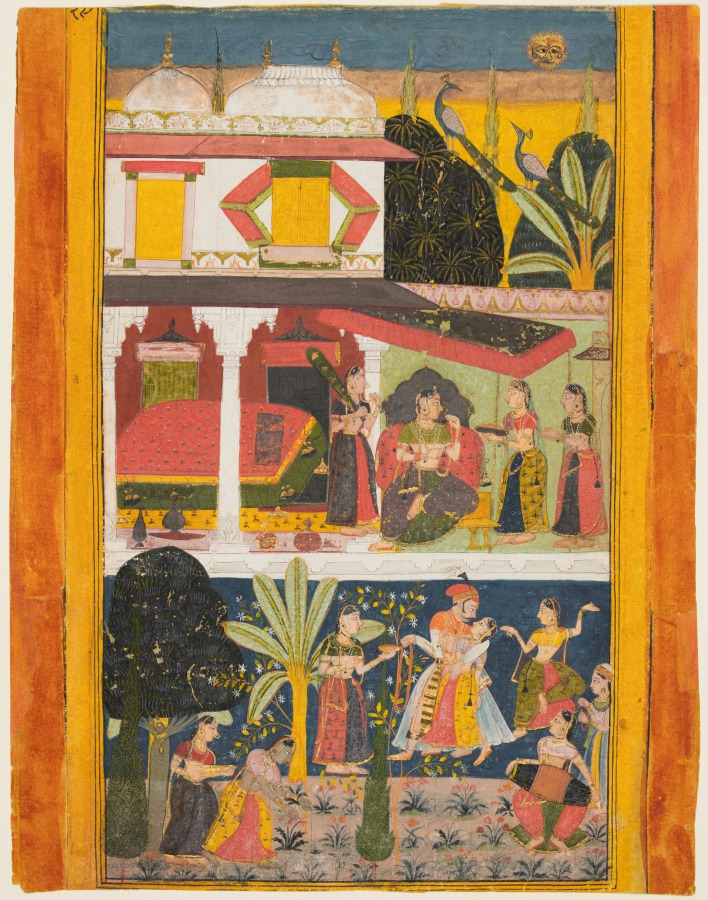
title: A Heroine and Her Paramour: Malavi Ragini, from a Ragamala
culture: Northwestern India, Rajasthan, Rajput Kingdom of Mewar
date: c. 1695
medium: gum tempera, ink, and gold on paper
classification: Painting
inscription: mālavī gauda’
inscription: 29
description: The painting is divided into two registers. The top register depicts a royal lady being attended by maidservants outside a bed chamber. The lower register depicts a noble walking with his consort, holding her tight and offering her a garland. The surrounding women dance and play music with an exuberance echoed in the vegetation.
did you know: The sun has a human face and gazes on the scene.